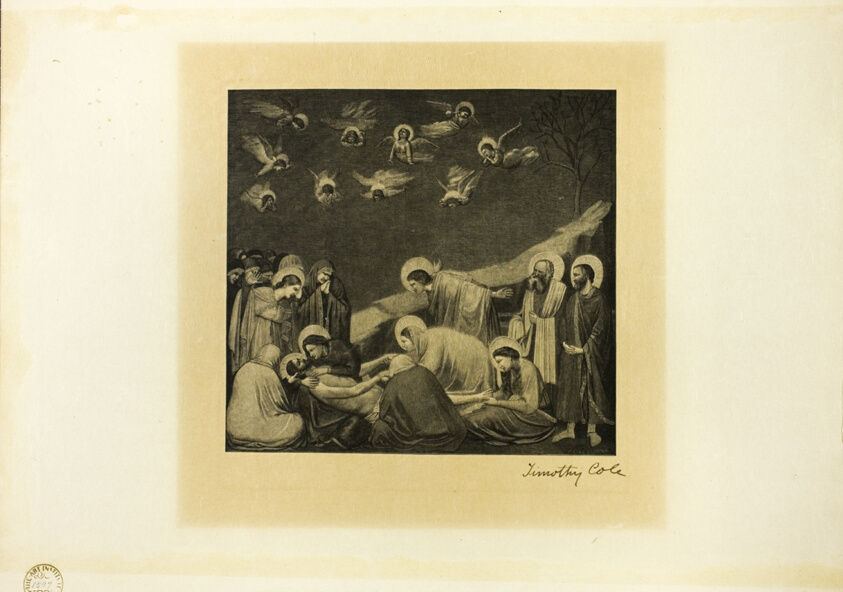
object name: Print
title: The Entombment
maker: Timothy Cole (American, born England, 1852-1931); after Giotto (Italian, 1266-1337); published by Harper and Brothers (American, 1833-1962)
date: published September 1877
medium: Wood engraving on Japanese paper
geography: United States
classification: wood engraving; print; prints and drawing